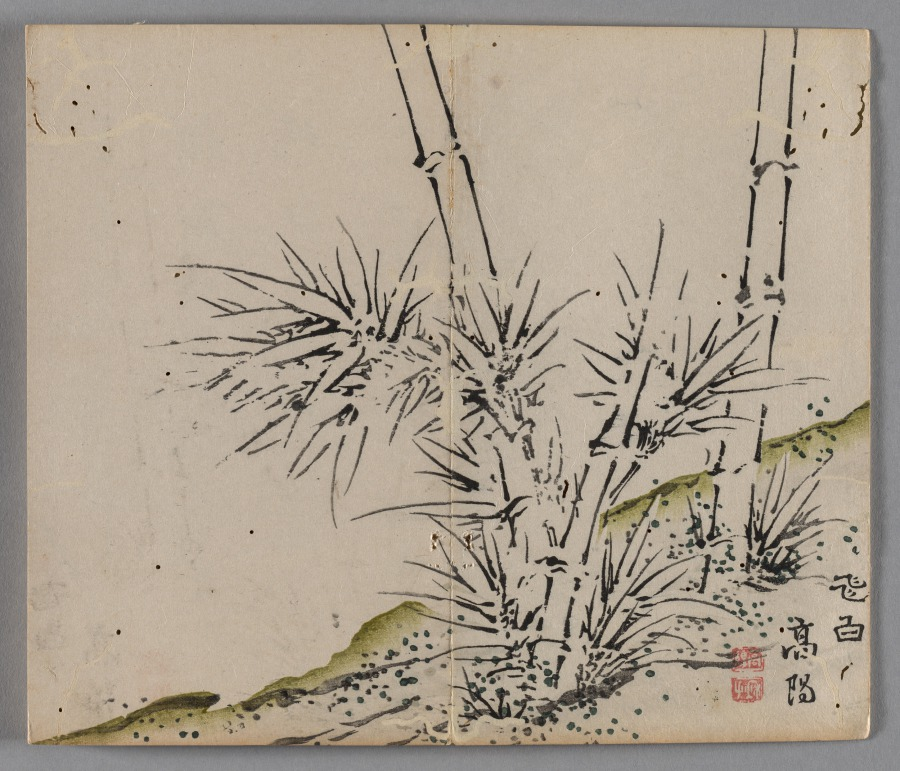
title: Ten Bamboo Studio Painting and Calligraphy Handbook (Shizhuzhai shuhua pu): Bamboo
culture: China, Qing dynasty (1644-1911)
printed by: Hu Zhengyan (Chinese, c. 1584–1674)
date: 1633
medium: Woodblock-printed book; ink and colors on paper; first edition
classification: Print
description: Color printing reached a level of perfection in the early 1600s, as seen in this Ten Bamboo Studio Collection of Calligraphy and Painting and the Mustard Seed Garden Manual of Painting (printed 1679 and 1701). The painterly quality, precision in registering (aligning) the woodblocks, and harmonious colors made them the most successful color print editions in Chinese history. Both editions were printed and compiled in Nanjing, spread nationwide, and had a great impact on the arts in Japan and Korea.